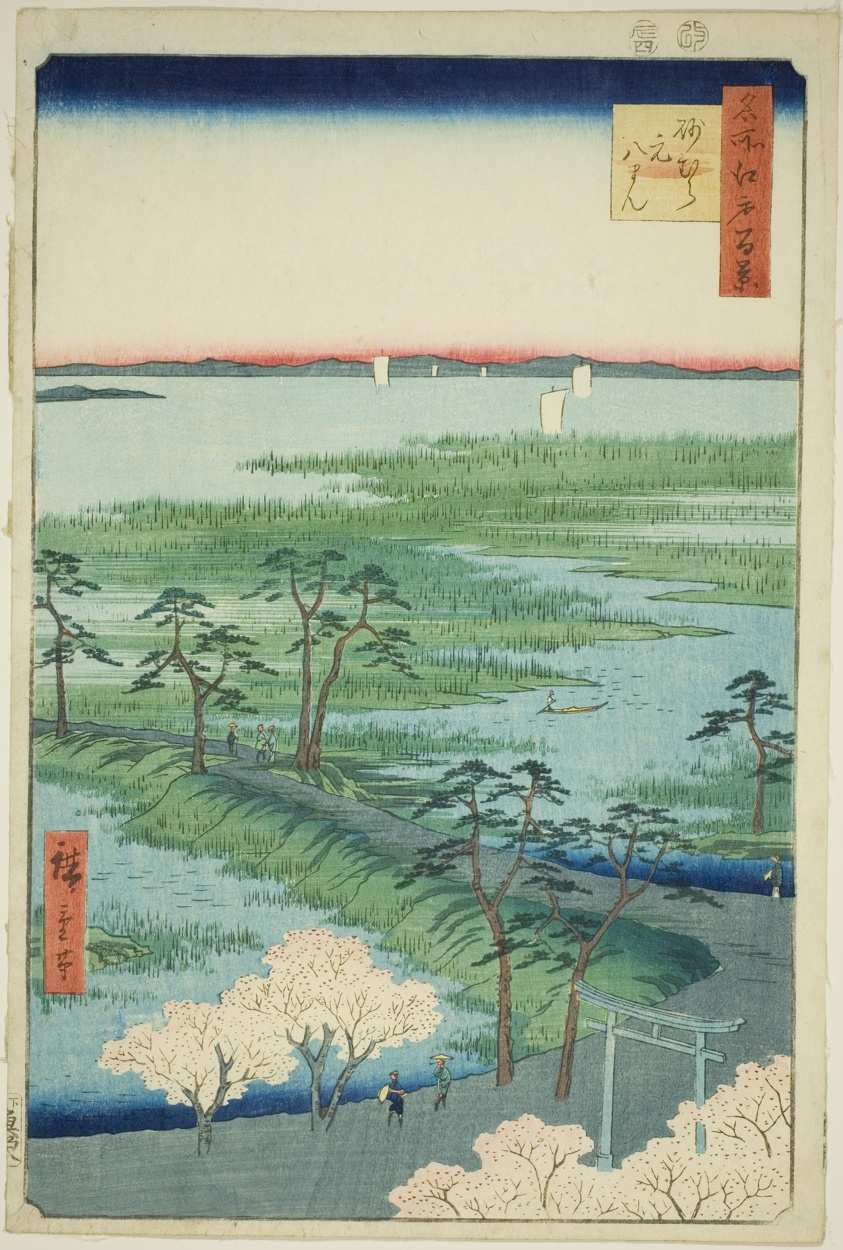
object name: Print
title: Moto-Hachiman Shrine, Sunamura (Sunamura Moto-Hachiman), from the series "One Hundred Famous Views of Edo (Meisho Edo hyakkei)"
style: Japanese (culture or style)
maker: Utagawa Hiroshige 歌川 広重; Japanese, 1797-1858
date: 1856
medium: Color woodblock print; oban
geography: Japan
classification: woodblock print; print; asian art